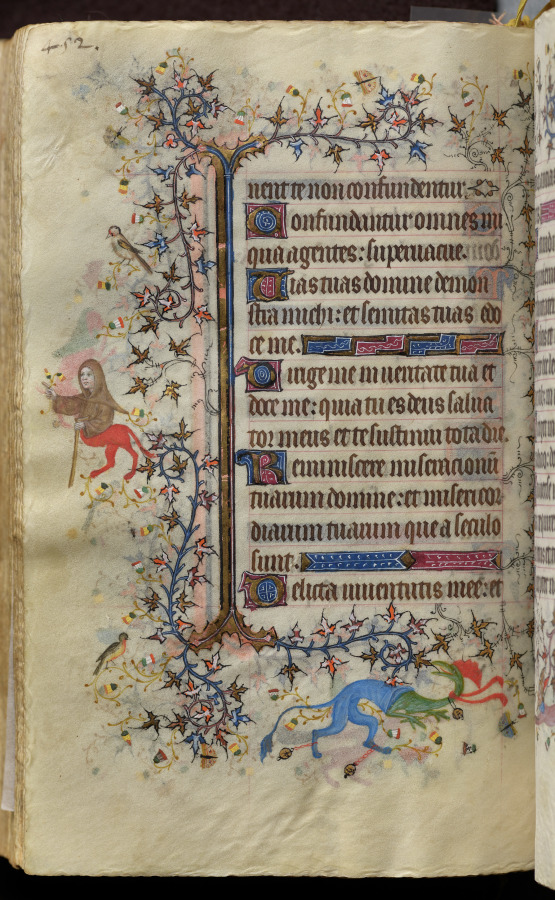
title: Hours of Charles the Noble, King of Navarre (1361-1425): fol. 220v, Text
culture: France, Paris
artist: Master of the Brussels Initials and Associates (French)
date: c. 1405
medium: ink, tempera, and gold on vellum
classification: Bound Volume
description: This precious volume was obviously highly prized by its owner, the French-born King of Navarre, who had his coat of arms painted on no less than twenty folios. Rather than directly commissioning this manuscript from a specific workshop, it seems that Charles the Noble acquired his book of hours -- perhaps ready-made for the luxury market -- while on a trip to Paris in 1404-05. A collaborative effort, six painting styles are evidenced within the pages of this codex, those of two Italians, two Frenchmen, and two Netherlanders. The painter who was responsible for the planning and decoration of the book, and who produced seventeen of the large miniatures, was a Bolognese artist known as the Master of the Brussels Initials. His principal assistant, responsible for most of the borders, was a Florentine who signed his name "Zecho" da Firenze on folio 208 verso.